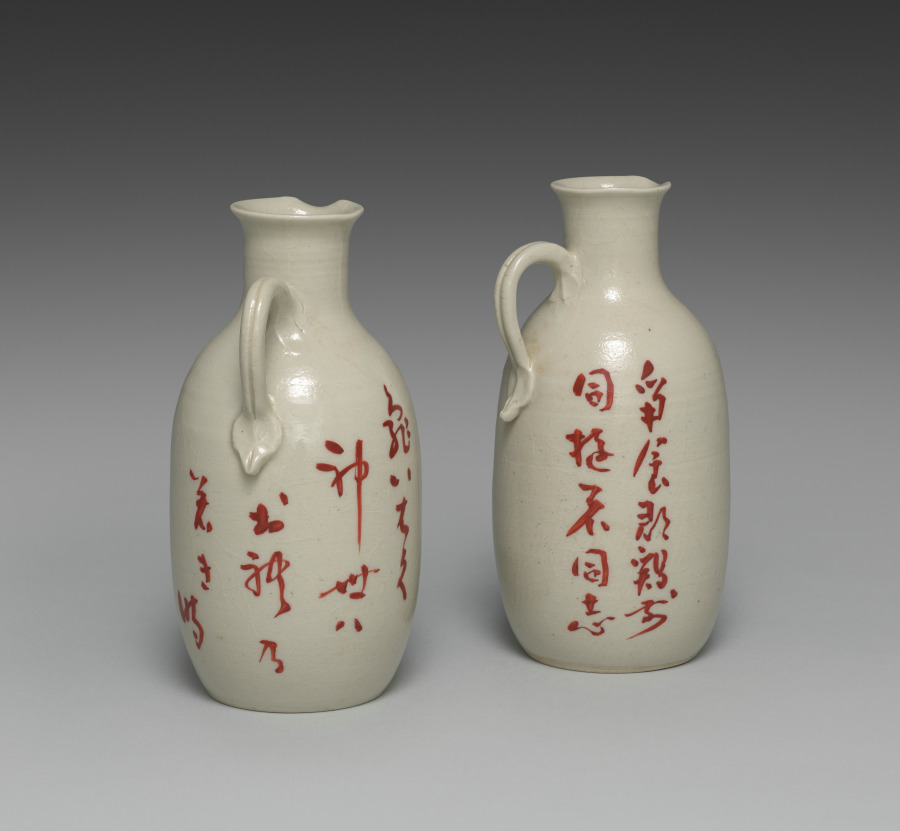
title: Sake Pourers with Crane and Tortoises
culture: Japan, Meiji period (1868–1912)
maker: Seifū Yohei III (Japanese, 1851–1914)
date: 1893–1914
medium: Pair of sake flasks; porcelain with overglaze color enamel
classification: Ceramic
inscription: 爭食羣雞前，同遊者同志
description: One flask of this pair has stencil-like paintings of three turtles—a young one with its parents—while the other has a crane with a leg raised. Cranes and turtles are well-recognized symbols of longevity in East Asia, with the turtle said to live for ten thousand years and the crane for one thousand. Each flask also has a poem on the back, one in Chinese and the other in Japanese. The latter, which appears on the turtle flask, reads kame iwaku kamiyo wa, ore no wakaki toki. The seventeen-syllable poem begins with “turtle” and ends with “when I was young.” It can be translated as, “the turtle said the world of the gods began when I was young.” The poem on the crane flask is two nonconsecutive five-character lines from a poem called “Crane Feelings” by the famous Tang dynasty poet Bai Juyi (772–846). One character in one of the lines has been altered. This creative poetic sampling results in a verse reading zheng shi qun ji qian, tong you zhe tong zhi 爭食羣雞前，同遊者同志. It could perhaps be translated, “before the flock of chickens competing for food, those traveling together have the same ambitions.”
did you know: This pair of seemingly humble sake pourers celebrate longevity and delight in a literary tradition that embraces multiple forms of poetic expression.